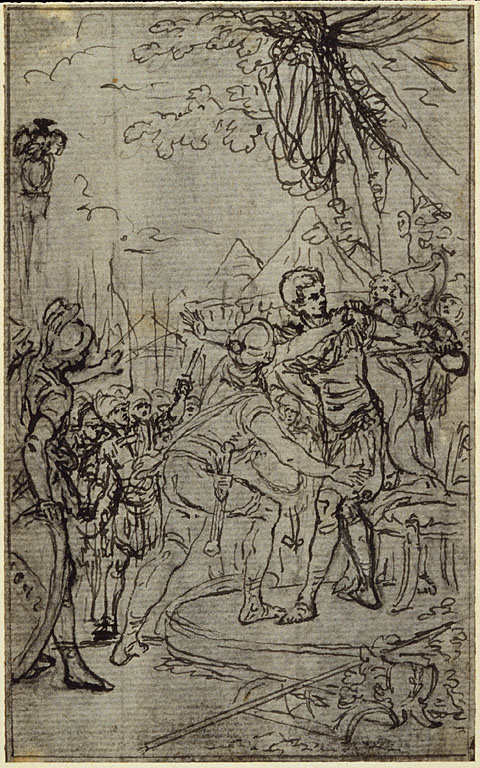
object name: Drawing and Watercolor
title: Study for an illustration in Tacitus "Tibère, ou Les Six Premiers Livres des Annales" Book I, Vol. 1, 3rd Study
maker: Hubert François Gravelot (French, 1699-1773)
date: c. 1768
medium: Pen and black ink, over traces of black chalk, on gray laid paper, incised for transfer, perimeter mounted on ivory laid paper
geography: France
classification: pen and ink drawings; drawings (visual works); prints and drawing